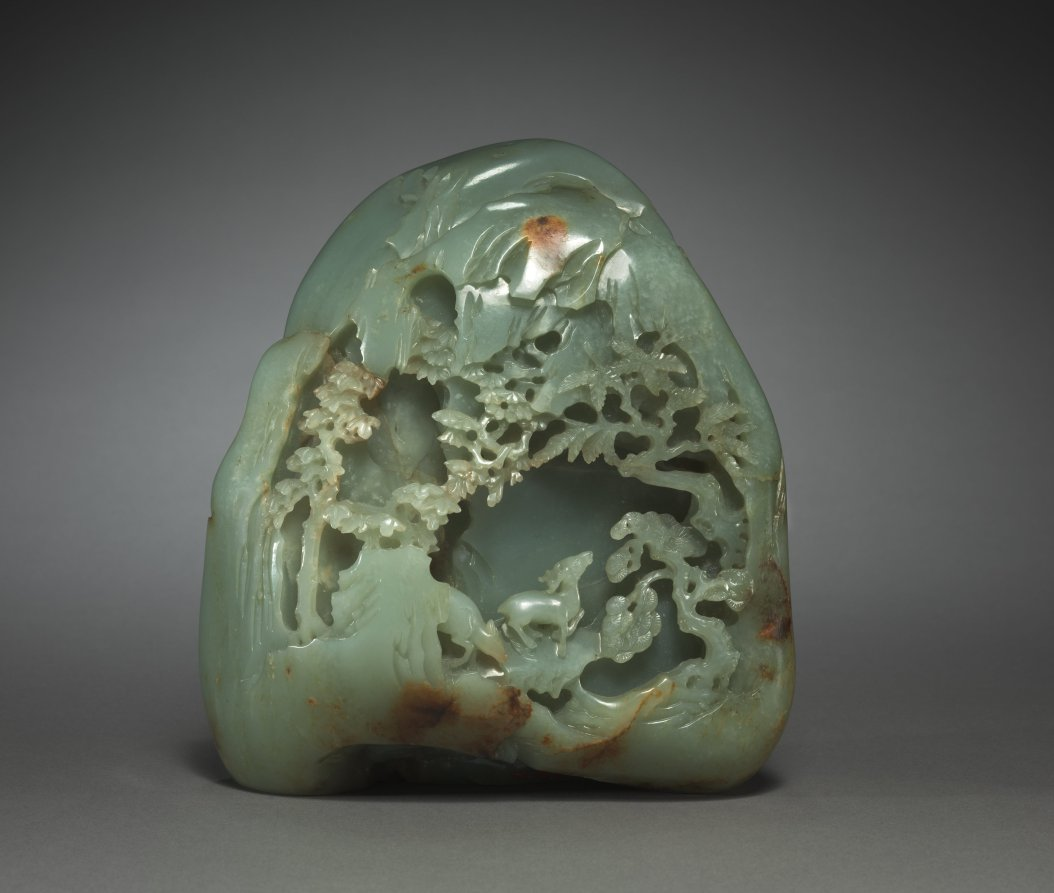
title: Miniature Mountain with Daoist Paradise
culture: China, Qing dynasty (1644–1911), Qianlong reign (1736–95)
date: 1736–95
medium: green jade with brown markings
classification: Jade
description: Sizable jade boulders of mountainous landscapes were carved to represent the search for the paradise or immortals' dwellings in the mountains. This Daoist theme has fired the Chinese imagination throughout history. Believed to have spiritual and magical properties, jade has long been used in tombs and intended for preserving the corporeal body and the soul in the quest for eternity. It is recorded that Daoist practitioners drank morning dews with scraps of jade as an elixir of immortality.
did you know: The bearded immortal is accompanied by a servant carrying a cluster of peaches, symbols of immortality.